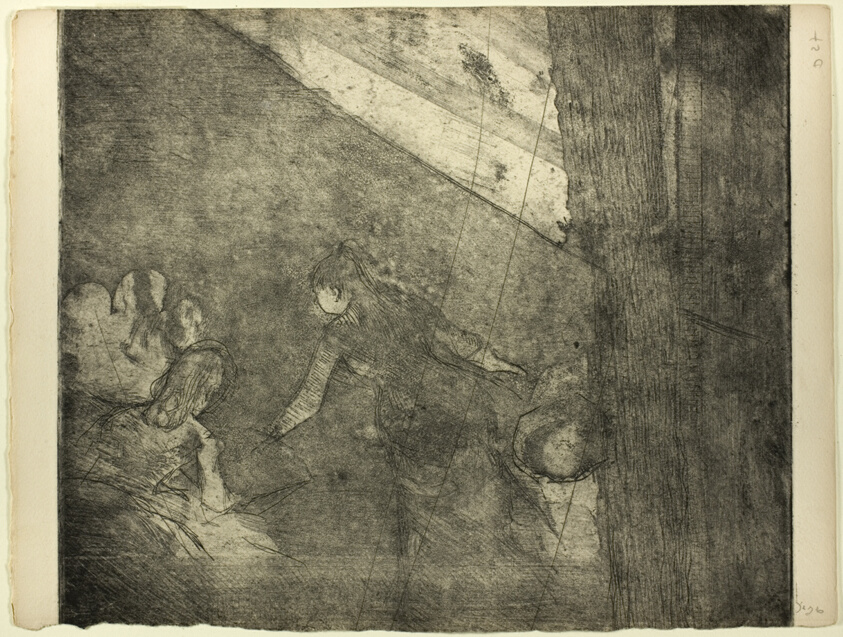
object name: Print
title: At the Café des Ambassadeurs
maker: Edgar Degas; French, 1834-1917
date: 1879–80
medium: Etching, soft ground, drypoint, and aquatint on cream wove paper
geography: France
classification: etching; print; prints and drawing; paper